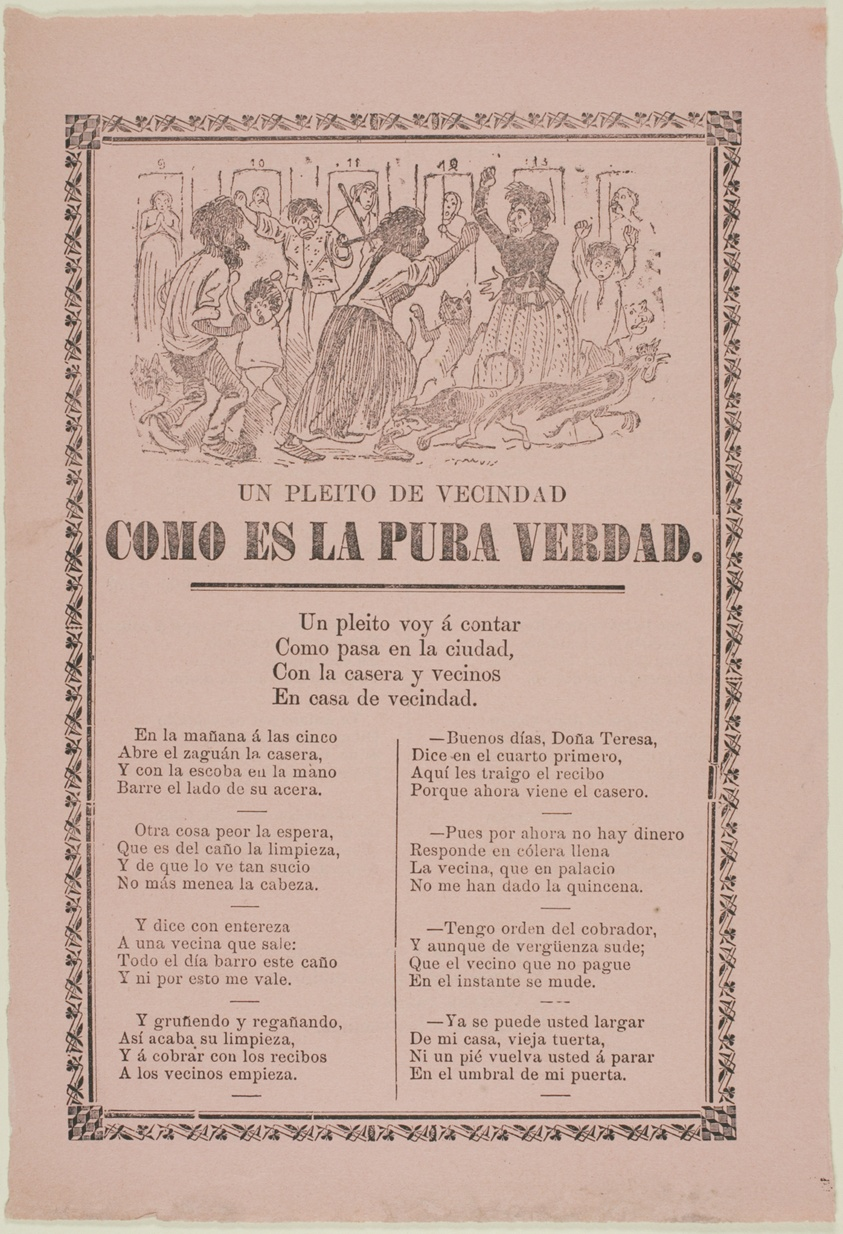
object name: Print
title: A Neighborhood Dispute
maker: José Guadalupe Posada (Mexican, 1852-1913)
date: 1907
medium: Double-sided relief engraving on zinc on paper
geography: Mexico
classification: woodcut; print; prints and drawing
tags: text